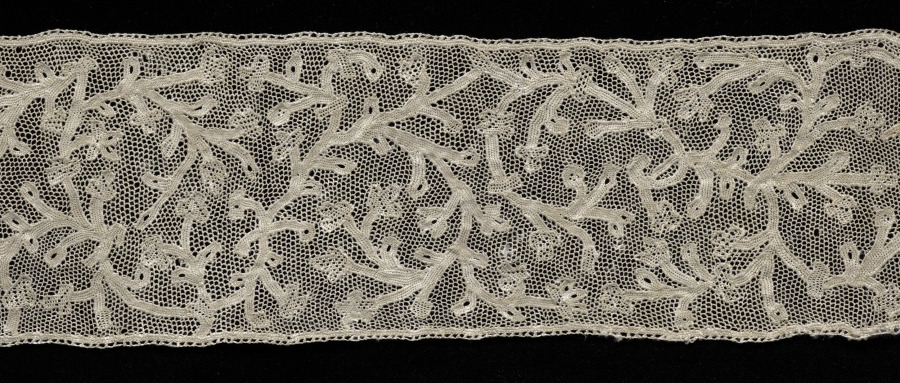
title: Lace Insertion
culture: Italy, Burano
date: 1700s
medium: Silk: needle lace (Burano Point) insertion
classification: Lace